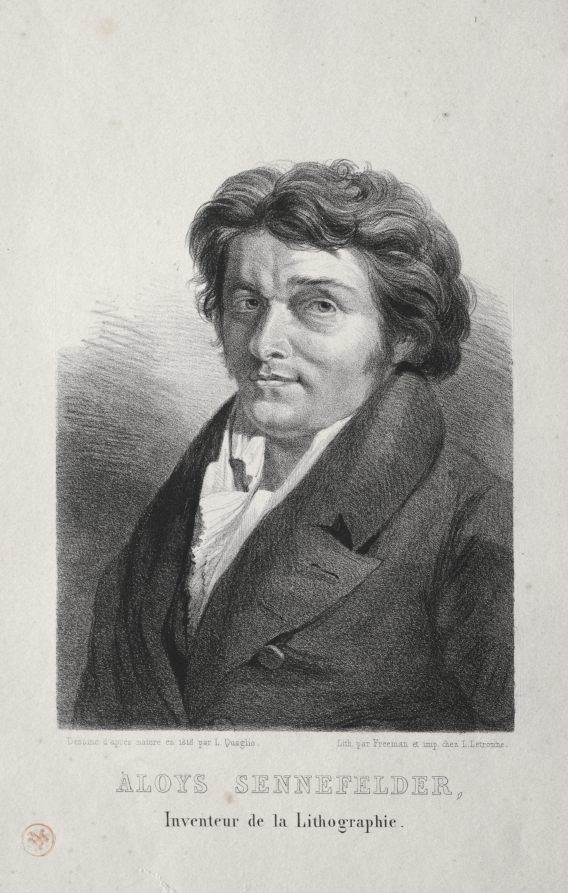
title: Aloys Senefelder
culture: Germany, 19th century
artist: Lorenzo II Quaglio (German, 1793–1869)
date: 1818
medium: lithograph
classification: Print